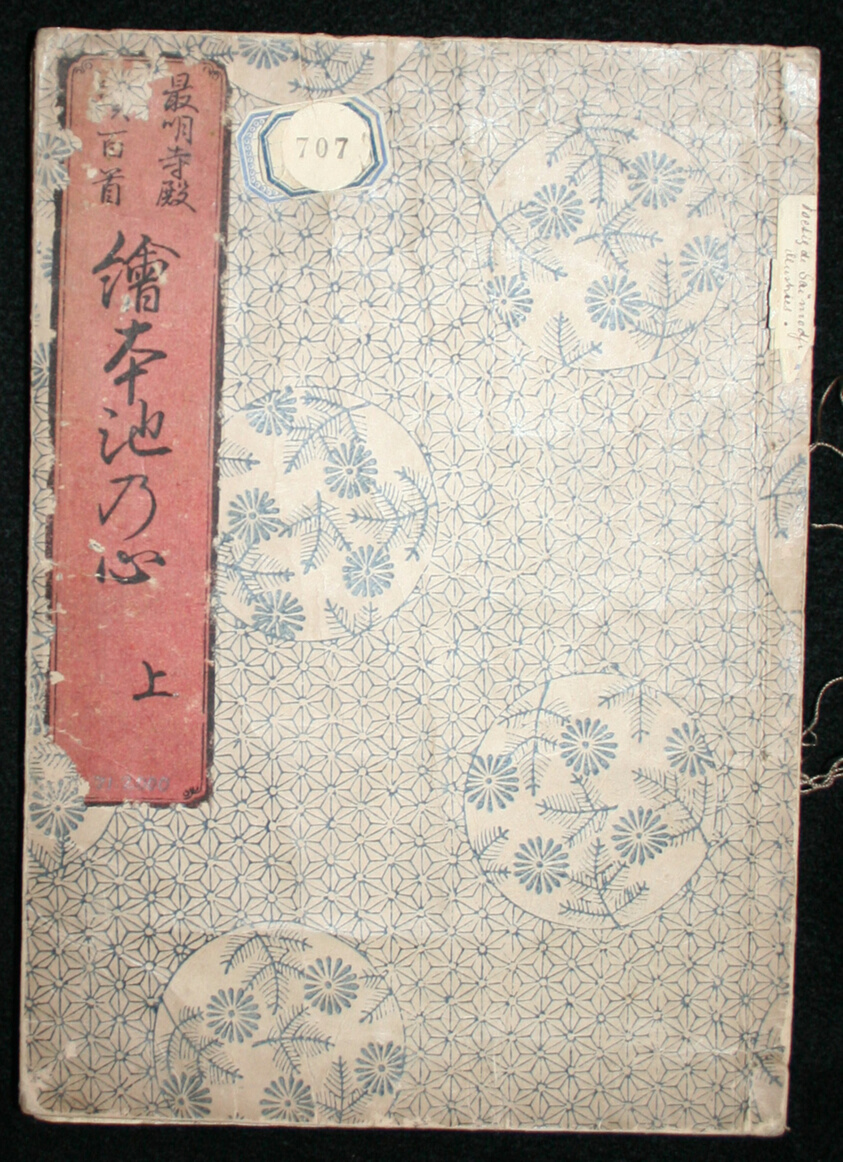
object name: Book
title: Ehon ike no kokoro (pair has old stickers #707)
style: edo (japanese period), Japanism, East Asian, asian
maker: Nishikawa Sukenobu (Japanese, 1671-1750)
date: 1739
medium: Woodblock printed book, two volumes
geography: Japan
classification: book; asian art